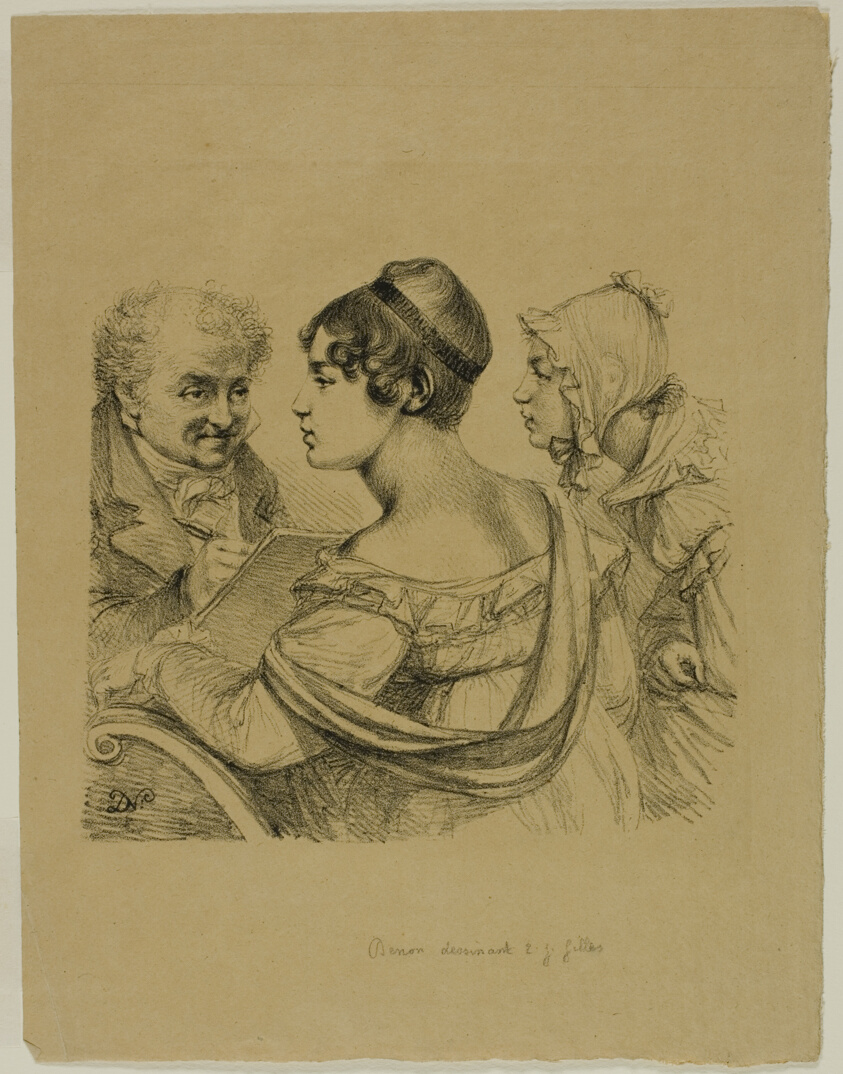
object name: Print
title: Self-Portrait with Two Young Ladies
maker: Dominique-Vivant Denon (French, 1747-1825)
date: c. 1816–17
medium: Lithograph in black on tan wove paper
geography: France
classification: lithograph; print; prints and drawing